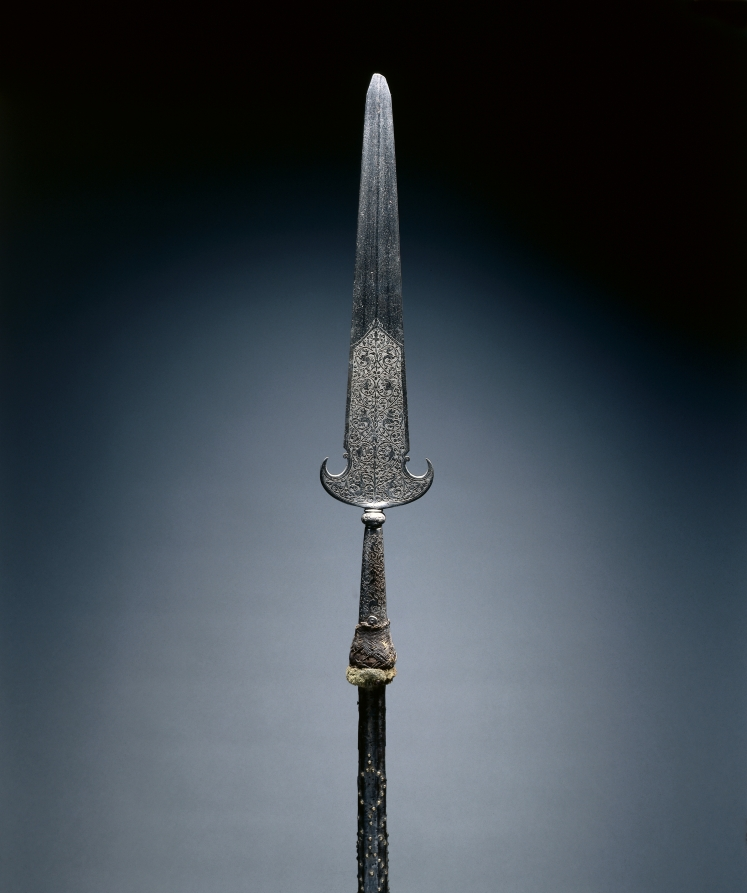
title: Partisan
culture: France, 17th century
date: c. 1600–50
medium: steel, etched; octagonal wood haft with studs and leather; remnants of velvet tassel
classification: Arms and Armor